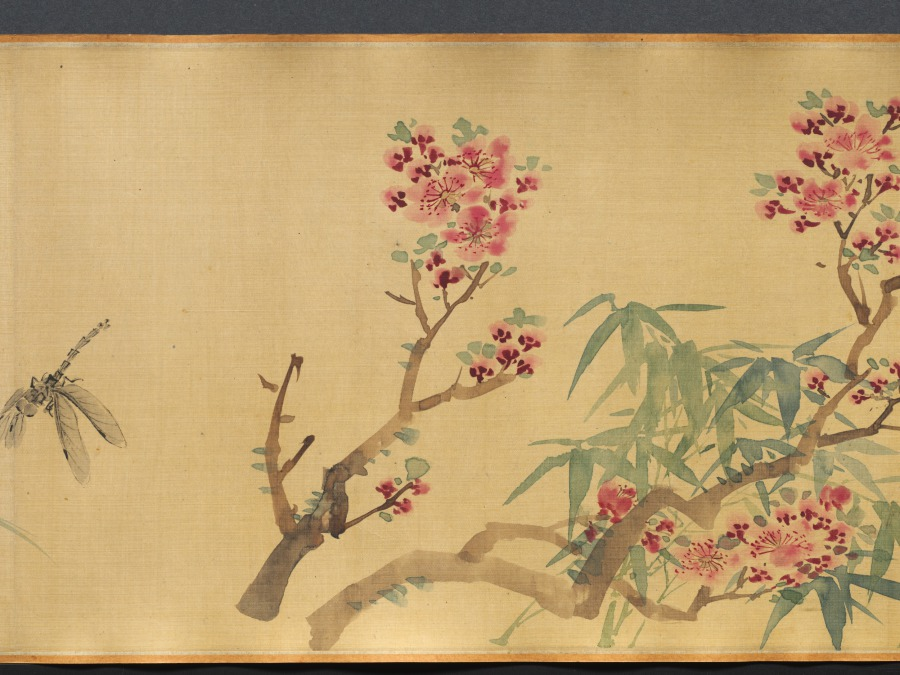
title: Flowers of Four Seasons, with Poems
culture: China, Ming dynasty (1368–1644)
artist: Wang Guxiang (Chinese, 1501–1568)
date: 1531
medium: handscroll; ink and light color on silk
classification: Painting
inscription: Artist's inscription, signature, and 15 seals. Ink Orchids. Sewn as pendants for the man of worth, swaying quiety, fragrance in the valley. [seal] Hsiao-chu ts'un Peony. Wiping his face, the young gentleman Ho [Ho Yen of Wei, Three Kingdoms] appears to have been powdered. His previous life was the perfume-stealing Han Shou [of Chin, 265–419 CE], the fragrance still lingers. [seal] Ts'un-wu chai. Flowering Crab Apple, New Bamboo. Shao-lin [Du Fu, 712–770] had to put down his brush. [Flowering Crab Apple]. Yü-k'o [Wen T'ung, d. 1079) in vain wrote poems about [Bamboo]. [seal] Yu-shih. Lotus Flowers. When she turns her head, half-hidden by a fan, and casts a glance, all the beautiful women become colorless. [seal] K'ang yüeh huai. Loquat. Ripeness in summer. [seal] Lu-chih. Pomegranate Flower. Whenever I remember you I will send my thoughts, but where have you gone--the [skirt] of pomegranate red? [seal] Wu-ho Sheng. Day Lily. Plant the day lily to forget sorrow. [seal] Yu-shih. Chrysanthemum. The untrammelled joy at the eastern fence. [seal] Lu-chih. Begonia. Comparing it to the beauties of Spring, and spreading them out as trimming for the stone steps. [seal] Yu-shih. Hibiscus. In recent years I have always enjoyed looking at flowers; instead of dark red I preferred pink ones. [seal] Jen-sheng i-lou. Narcissus, Camellia. The jade girdle left behind at Lo River. [Narcissus]. The precious pearls glitter before Spring. [Camellia]. [seal] Lu-chih. Heavenly Bamboo (Nandina domestica). A single branch in the wintry season. [seal] K'ang yüeh huai. Plum. Fragrant snow in the Lo-fou Mountains. [seal] Ts'un-wu chai. In the eleventh lunar month of the hsin-mao year of the Jiaqing era [1531], [I] imitated the boneless style of Yüan masters in sketching from life. Guxiang [seals] Yu-shih; Lu-chih. Translated by Wai-kam Ho/Lingyun Shih Liu (1980)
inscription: 2 colophons and 23 additional seals: 1 colophon dated 1632, and 2 seals of Li Jih-hua [Li Rihua] 李日華 (1565–1635); 1 colophon and 2 seals of Xiang Shengmo 項聖謨 (1597–1658); 3 seals of Liang Qingbiao 梁清標 (1620–1691); 6 seals of the Jiaqing 嘉慶 emperor (r. 1796–1820); 9 seals of Ch'eng Ch'i [Cheng Qi] 程琦 (1911–1988)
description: In this painting, flowers are loosely arranged by the seasons: narcissus and peony represent early spring; yellow loquat and lotus, summer; chrysanthemum, autumn; and the plum and evergreen bamboo, winter. The artist added to each flower a poetic line of calligraphy associating each plant with a historic or legendary figure. For example, the chrysanthemum, along with the line “The untrammeled joy at the eastern fence,” refers to the poet Tao Yuanming (died AD 427) who enjoyed chrysanthemums at the eastern fence in his garden. The scroll illustrates Wang Guxiang’s mastery of free brushwork, combining light monochrome ink with transparent colors. In his inscription, Wang says he used the “boneless” style without outlines as developed during the Yuan dynasty (1279–1368). Wang was a native of Changzhou, a city in southeast China known for its rich flora and fauna, and flower-and-bird painting tradition.